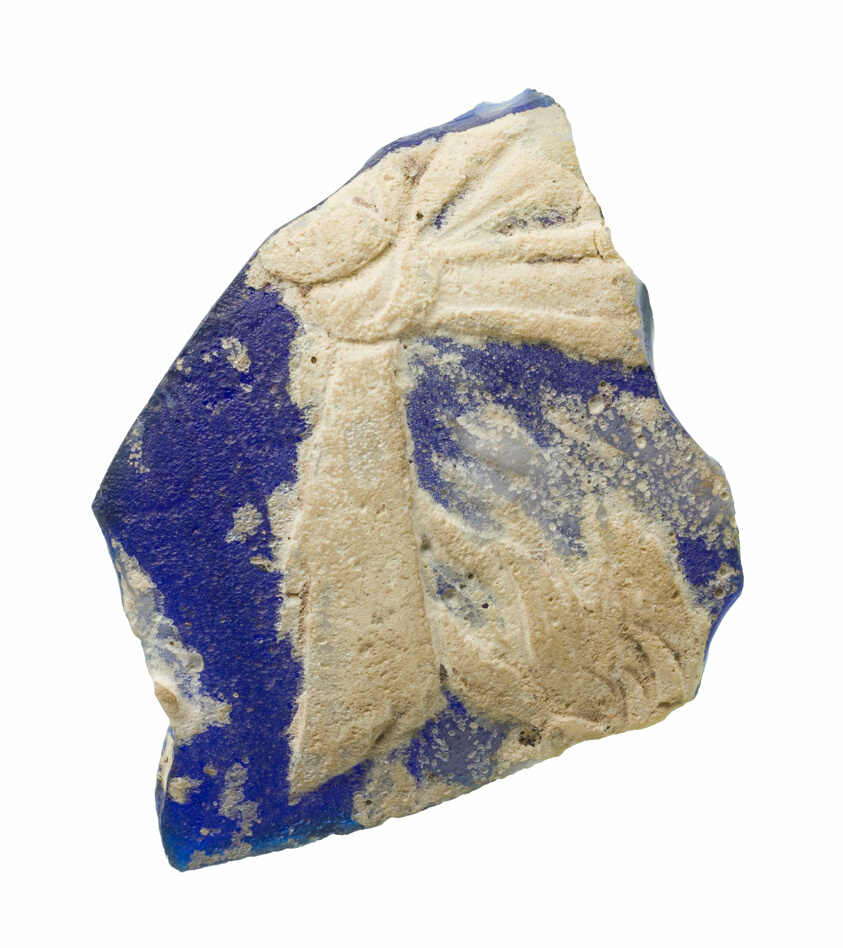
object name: Costume and Accessories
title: Fragment of a Vessel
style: roman (ancient, style or period), ancient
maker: Roman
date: 1st century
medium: Glass, blown technique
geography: Roman Empire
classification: fragment; jewelry; costume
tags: decoration